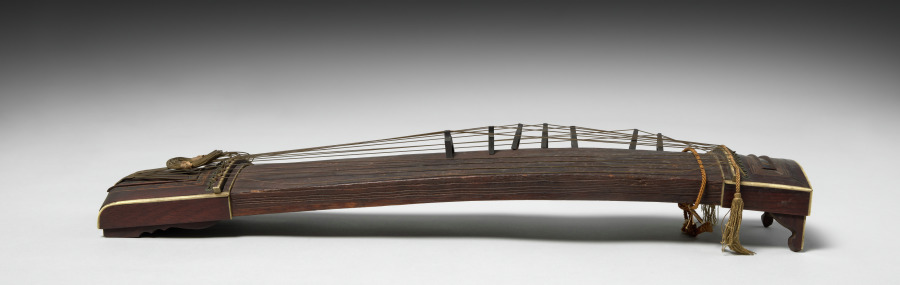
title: Koto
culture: Japan, Edo period (1615–1868)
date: early to mid-1800s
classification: Musical Instrument